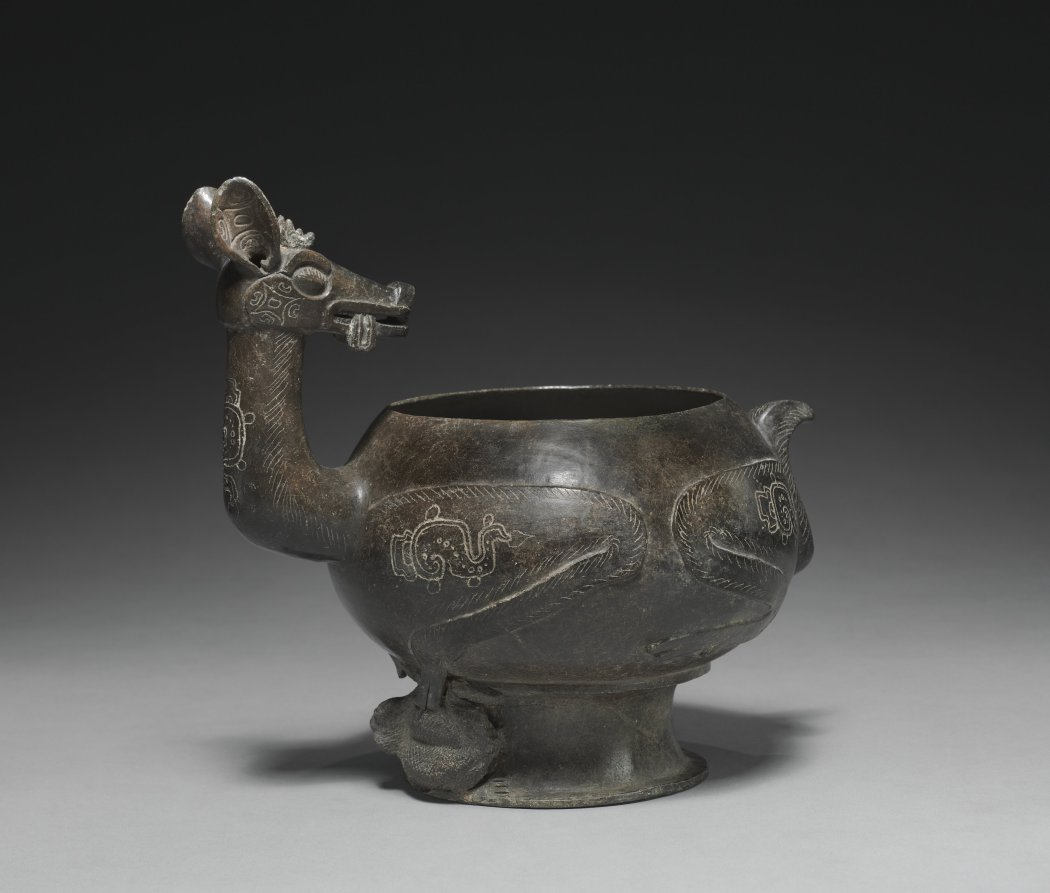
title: Deer Effigy Vessel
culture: Mesoamerica, Maya style, Classic Period (250-900)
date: 250–600 CE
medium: earthenware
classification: Ceramic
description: Maya artwork from the Early Classic Period (about AD 250-600) is dominated by three-dimensional sculpture in jade, stone, wood, and especially ceramic. This vessel is an exceptionally elegant example of Maya blackware, produced by firing earthenware pottery in a reducing (low oxygen) atmosphere. The deer is frequently depicted in Maya art, usually as a victim of either hunting or sacrifice. Venus signs and conch shells engraved on the deer also suggest death, for the planet Venus was regarded as a bringer of ill-fortune, and conch shell trumpets were carried by hunters. The small frog or toad pressed firmly under the deer's hoof relates to agricultural fertility. The croaking of these amphibians was a harbinger of rain.